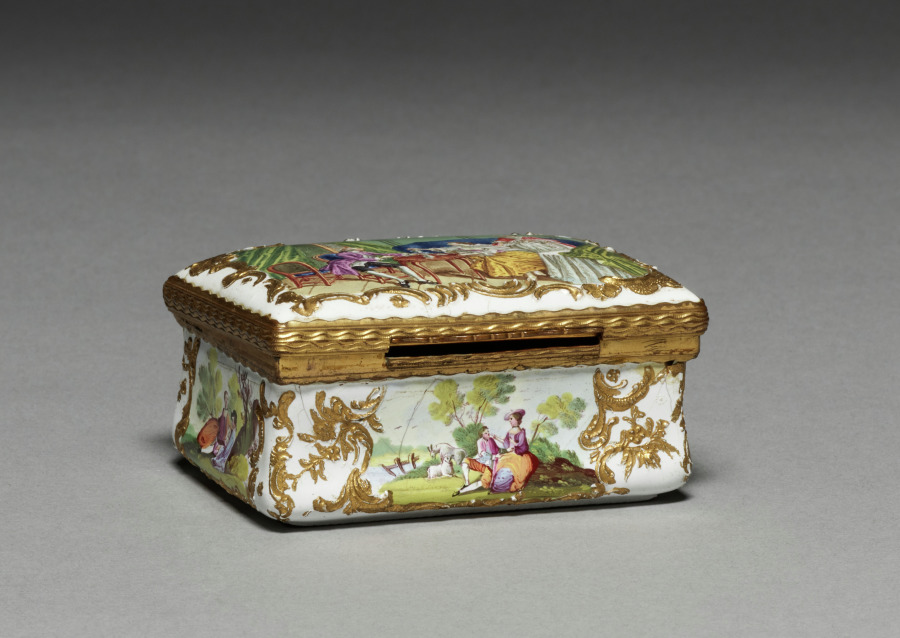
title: Box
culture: England, 18th century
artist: South Staffordshire Factory (British)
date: 1760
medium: enamel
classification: Enamel